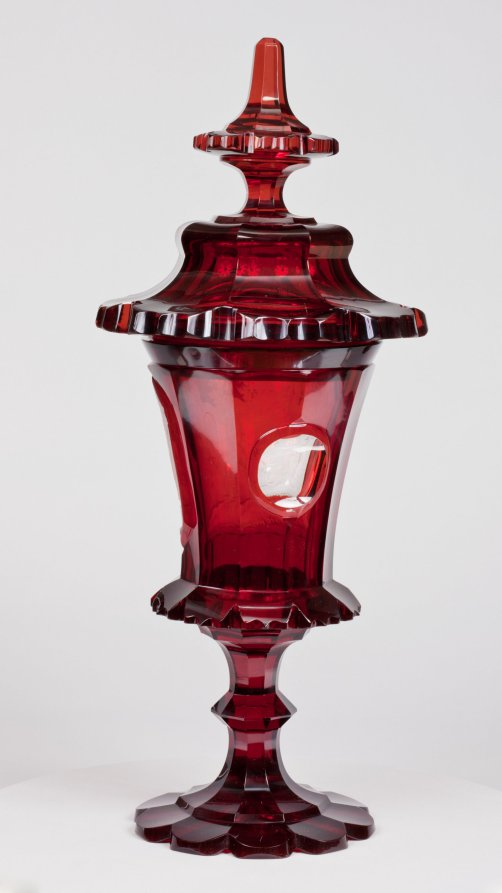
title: Covered Cup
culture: Bohemia, 19th century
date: mid-1800s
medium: ruby glass with engraved decoration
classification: Glass